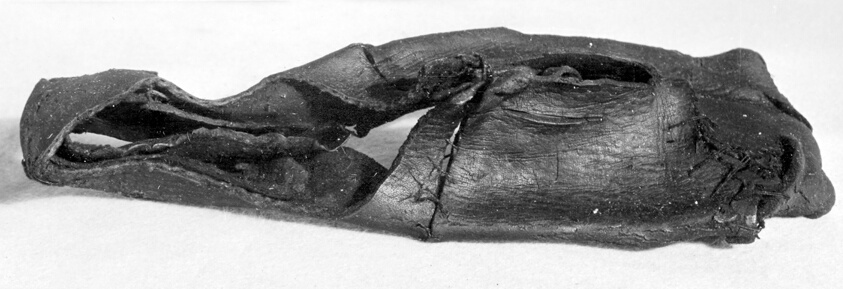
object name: Costume and Accessories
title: Man's Horned Toe Shoe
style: tudor, european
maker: England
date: 16th century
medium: Leather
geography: England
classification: textile; costume accessory - shoe; shoes - misc; costume; dress (garment); clothing